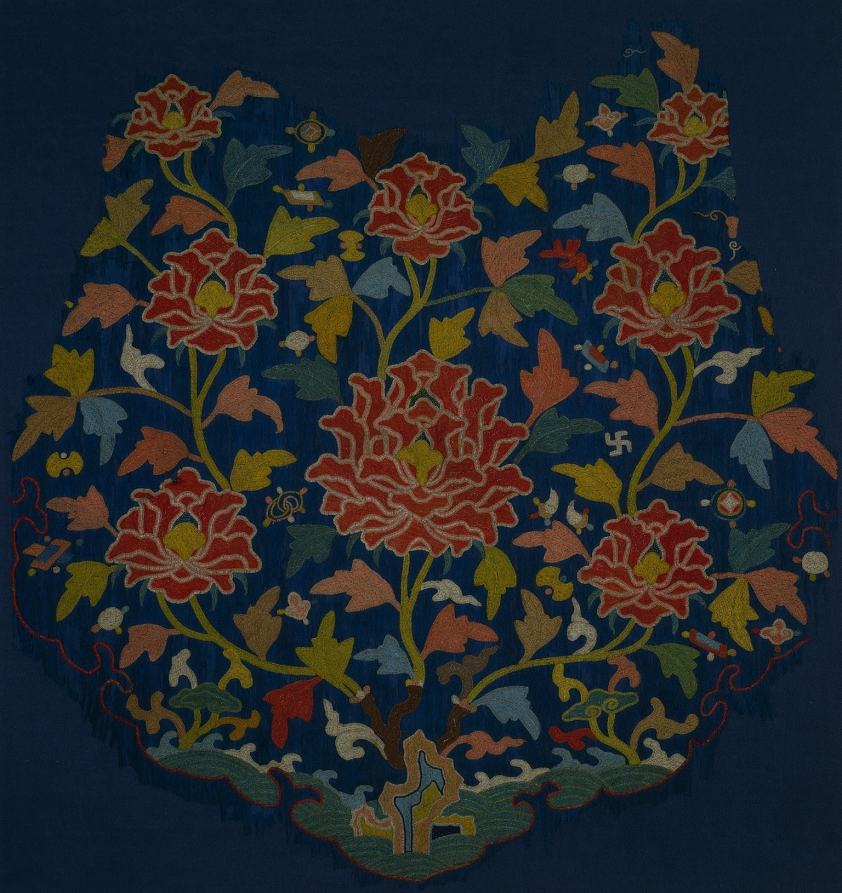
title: Embroidery from a Cloud Collar: Ocean, Rocks, and Peonies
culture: China, Yuan dynasty (1271-1368) - early Ming dynasty (1368-1644)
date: 1300s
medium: silk and silver thread, silvered paper; needleloop embroidery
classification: Embroidery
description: Against a deep blue satin ground, a peony tree emerges from an undulating sea. This embroidery was made using the needle looping technique, in which rows of detached loops are worked over silvered paper, attaching the ground only along the contours of the design. The design is filled with auspicious symbols, including the peony symbolizing wealth and honor, and the rock (shoushi 壽石) symbolizing longevity. There are small Buddhist symbols among the flowers, including the wheel of the law, a pair of conch shells representing the sounds of the Buddha’s teachings, and a swastika, an auspicious symbol signifying good fortune introduced into China from India with Buddhism.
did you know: Judging from the border on the lower portion, this fragment is most of one lobe of a cloud-collar medallion. Each of the three other original sections would have been embroidered with the same design.